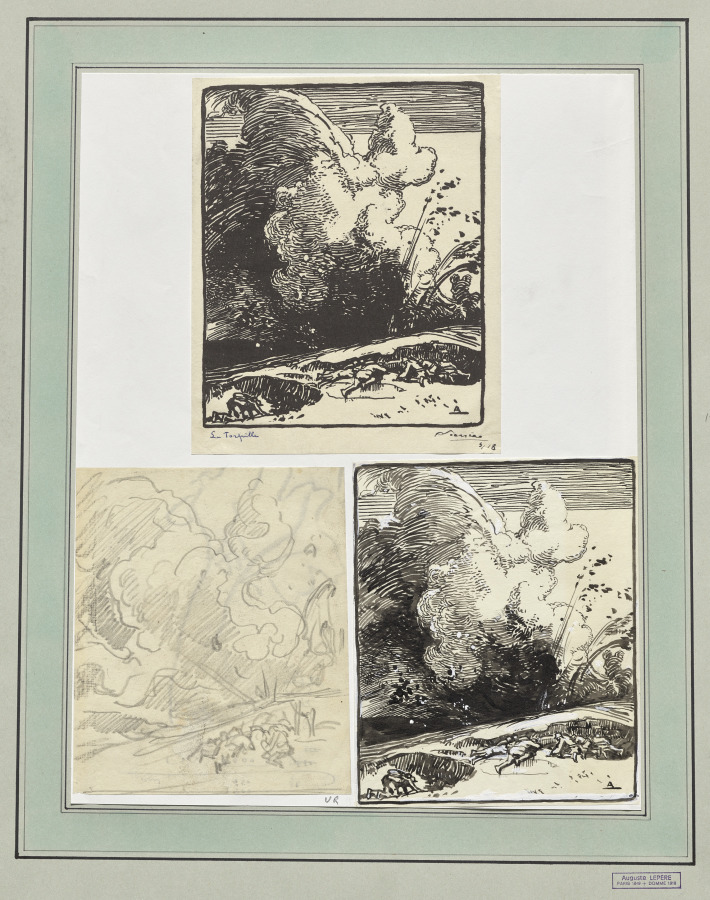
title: The Mine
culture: France, 20th century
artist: Auguste Louis Lepère (French, 1849–1918)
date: c. 1914–1924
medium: pen and brush and black ink heightened with white gouache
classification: Drawing